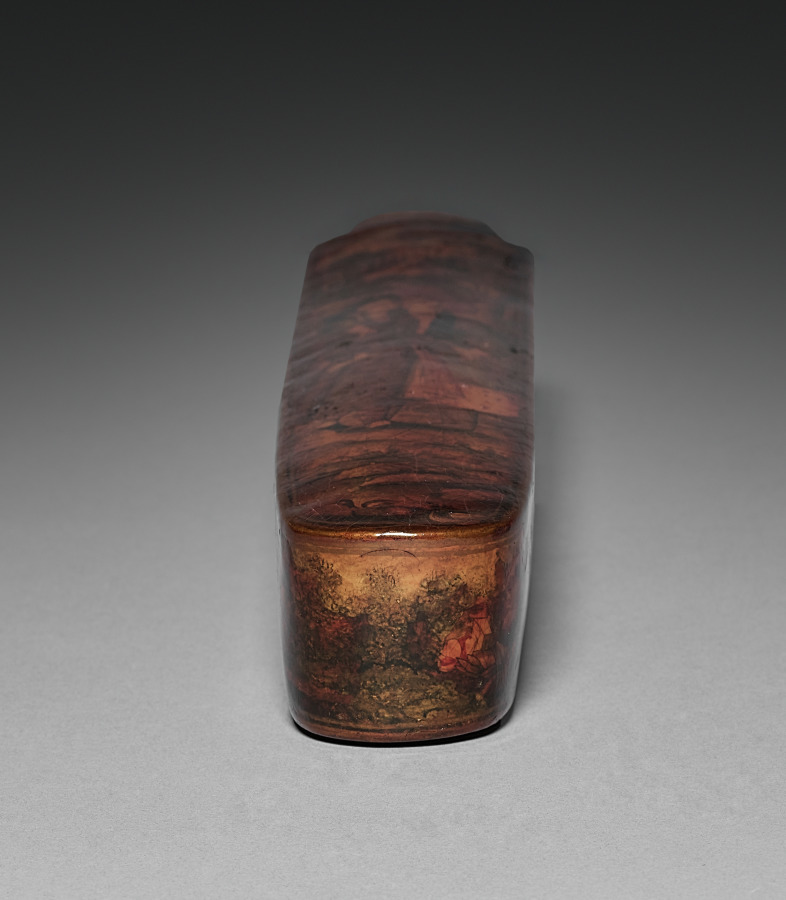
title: Pen and Ink Box (lid)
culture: Iran, probably Isfahan, Safavid period (1501–1722)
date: 1667–98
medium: Varnished lacquer and opaque watercolor over papier-mâché, ink, and copper alloy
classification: Lacquer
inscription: 1109